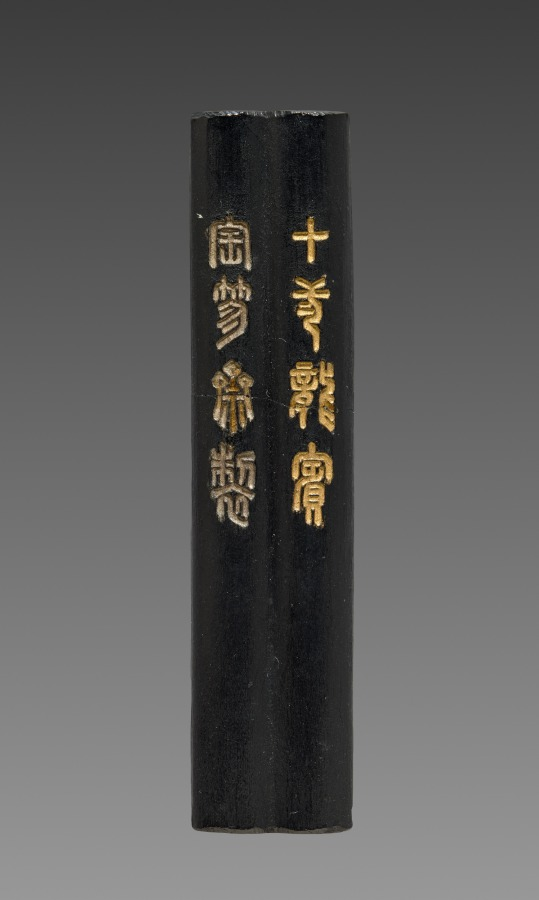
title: Ink Cake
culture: China, Qing dynasty (1644-1911)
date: 19th Century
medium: ink cake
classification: Miscellaneous